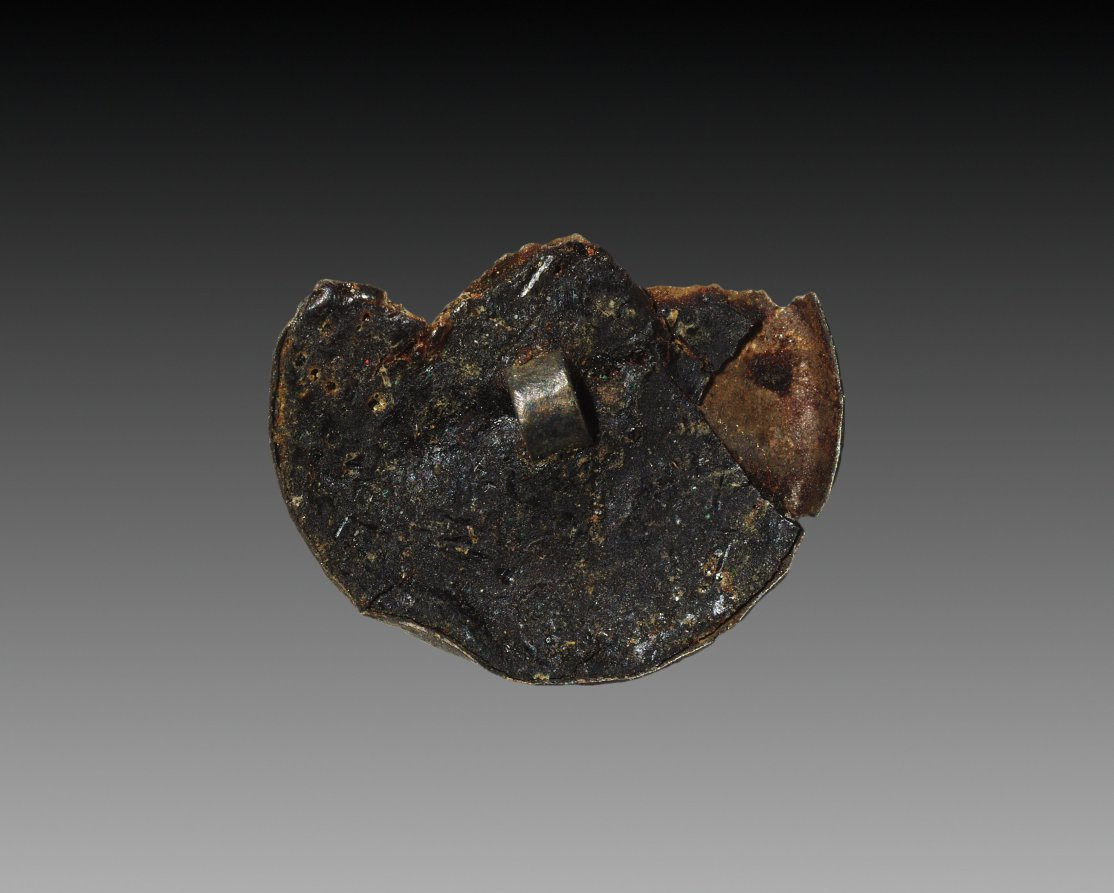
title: Rosette for Wig Decoration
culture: Egypt, Middle Kingdom (2040–1648 BCE), Dynasty 12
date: 1980–1801 BCE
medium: silver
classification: Jewelry